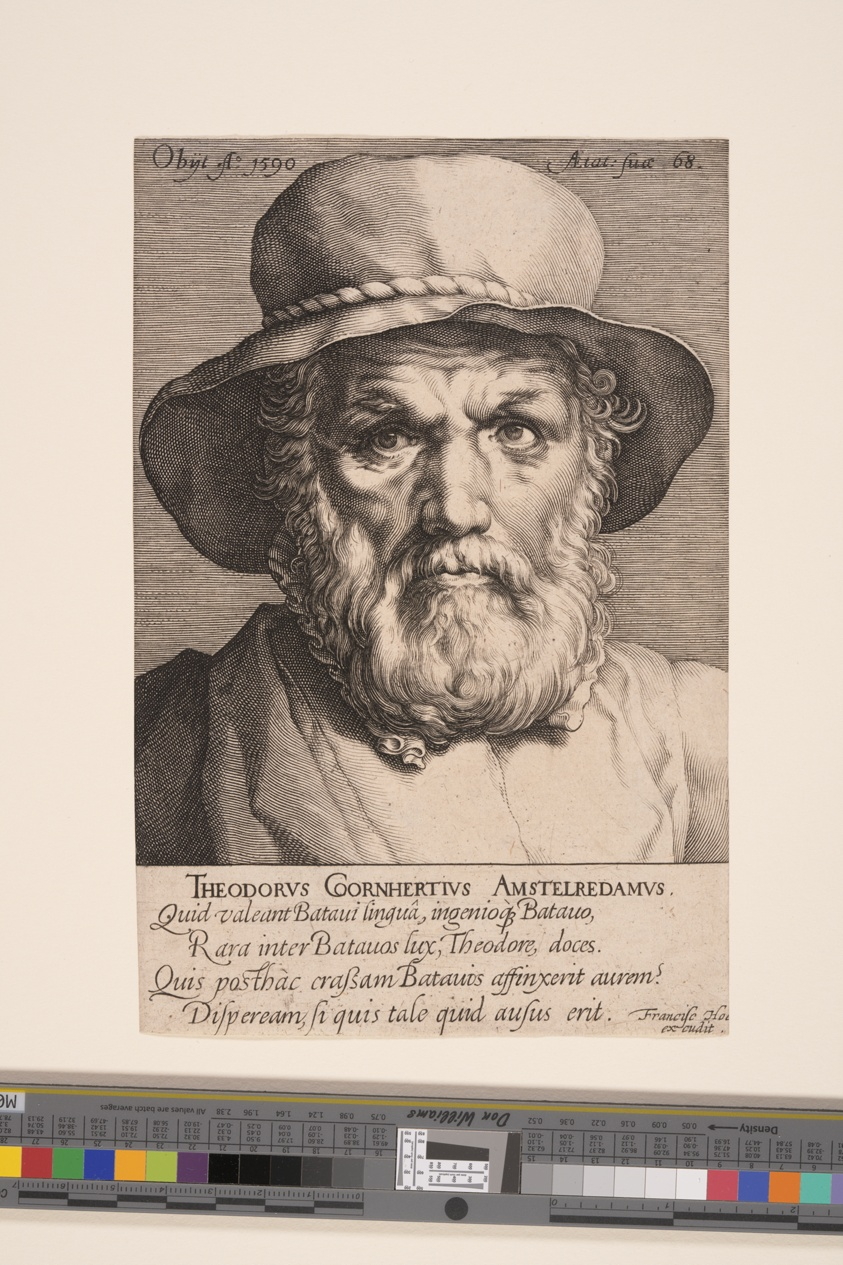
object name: Print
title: Dirck Volkertsz. Coornhert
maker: Jan Harmensz Muller; Dutch, 1571–1628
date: 1590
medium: Engraving on laid paper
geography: Netherlands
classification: print; engraving; paper; prints and drawing